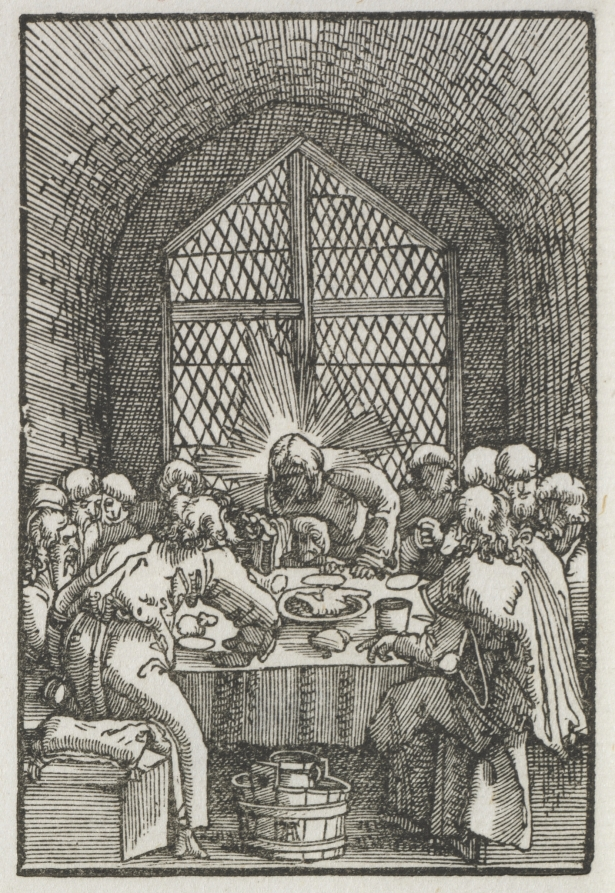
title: The Fall and Redemption of Man: The Last Supper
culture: Germany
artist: Albrecht Altdorfer (German, c. 1480–1538)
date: c. 1515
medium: woodcut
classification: Print